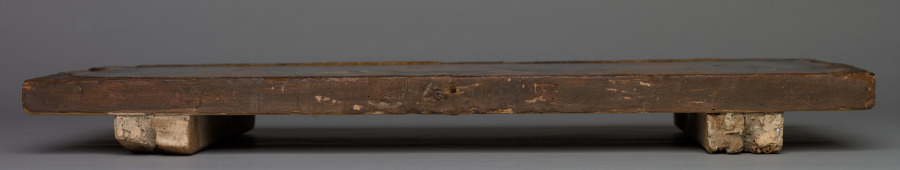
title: Icon of the New Testament Trinity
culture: Byzantium, Constantinople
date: c. 1450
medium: Tempera and gold on wood panel (poplar)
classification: Painting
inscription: Ο ΠΑΛΑΙΟC ΤΗΩ- God the Father as Christ in old age on right identified on either side of his head in gold, outlined in red.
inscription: ΤΟ ΑΙΟΝ ΠΝΑ- The Holy Spirit, identified by dove in gold outlined in red.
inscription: ΙΩCHΦ Ο ΠΟΙΗΤΗC- St. Joseph the Hymnographer identified on the left by gold letters, outlined in red.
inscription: ΚΟCΜ Ο ΠΟΙΗΤΗC- St. Kosmas the Hymnopgrapher identified on the right in gold letters in red outline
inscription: "'together with...you my God' and 'your dominion" in Scroll of Kosmas on the right.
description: This icon depicts an important subject in Orthodox Christian art, the three corresponding figures of the single godhead known as the Holy Trinity. The Trinity is represented here in a composition known as the “New Testament Trinity,” which features Christ and God the Father seated on a bench with a dove representing the Holy Spirit between them. The central field is occupied by a large wooden throne with gold highlights on which Christ (left) and the Ancient of the Days (God the Father as Christ in old age) are seated. The Holy Spirit, in the form of a dove, hovers within an eight-pointed star that signifies the eighth day, the future eon. On either side of the Trinity are two hymnographers, authors of hymns of praise, both identified by gold letters outlined in red—Saint Kosmas (about 675–752) on the left and Saint Joseph (about 812/818–about 886) on the right. They both suspend scrolls from round-arched windows. The icon likely was part of a church templon, the barrier that separated the nave from the sanctuary in an Orthodox church. It is not signed or dated; however, careful analysis of the painting’s style and technique places it in Constantinople around 1450, just prior to the city’s fall to the Ottomans in 1453. It represents a moment when Byzantine painting reached a brilliant crescendo.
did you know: More than just a breakfast food, eggs are used to make the tempera paint used in this painting.